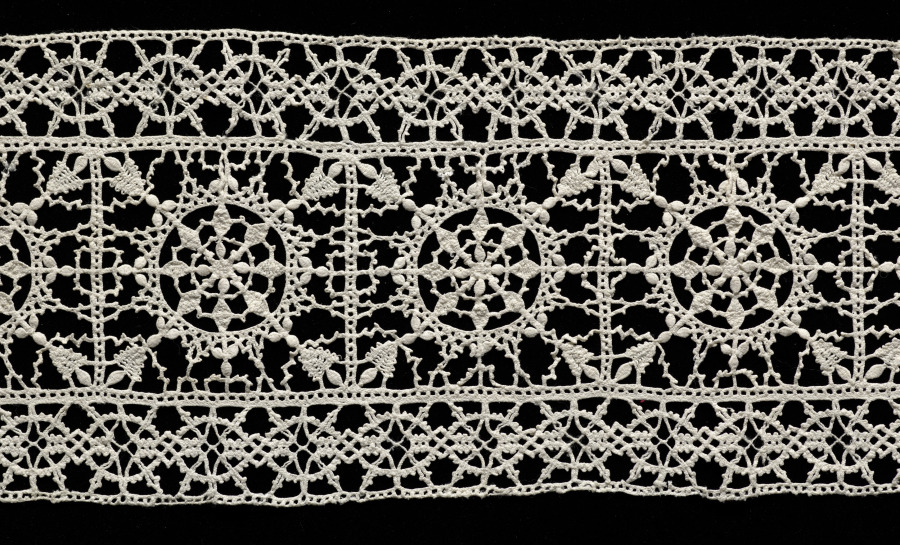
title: Lace Band or Border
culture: Italy, Genoa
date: 1500s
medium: Bobbin lace (needle lace, reticella design)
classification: Lace